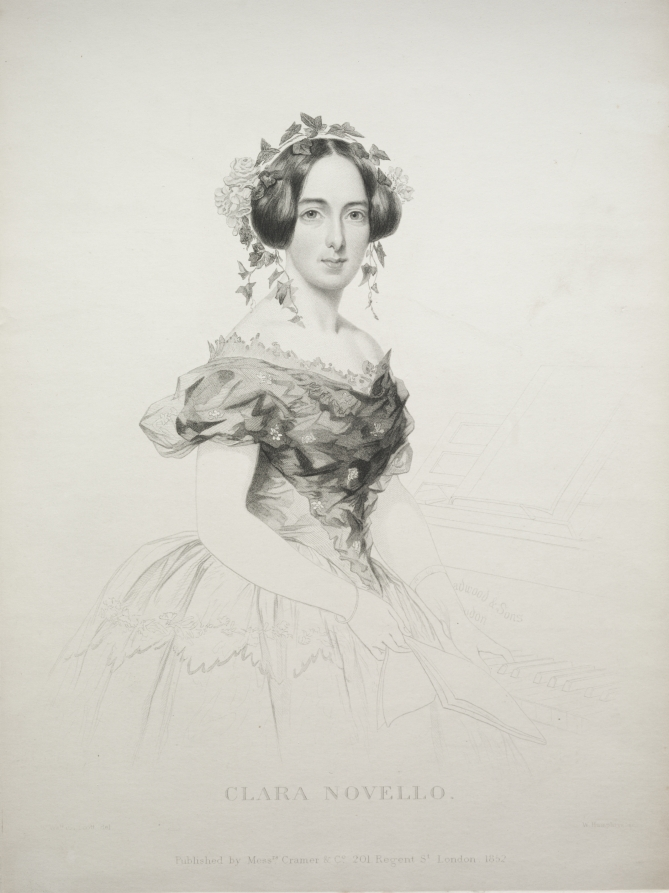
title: Clara Novello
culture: England, 19th century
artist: William Humphreys (British, 1794–1865)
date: 1852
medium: stipple and roulette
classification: Print